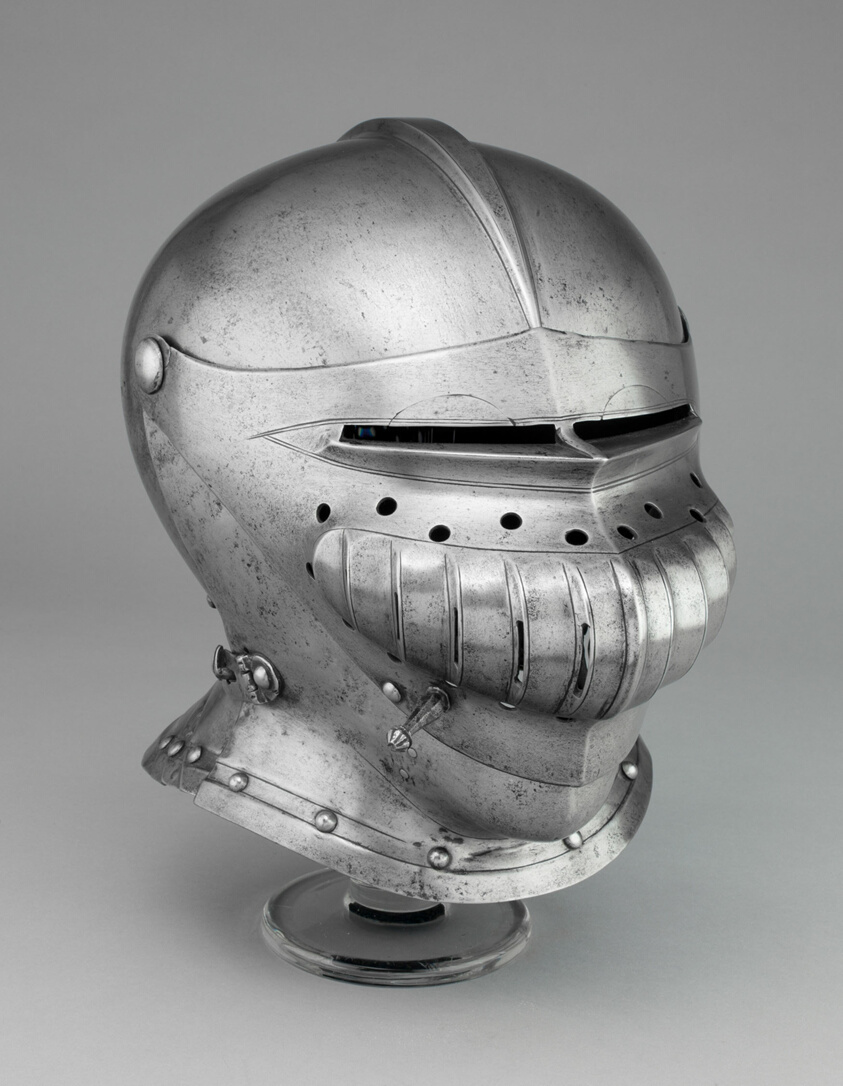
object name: Armor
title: Close Helmet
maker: South German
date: 1510/20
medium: Steel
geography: Southern Germany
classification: suit-helmet; armor; arms and armor